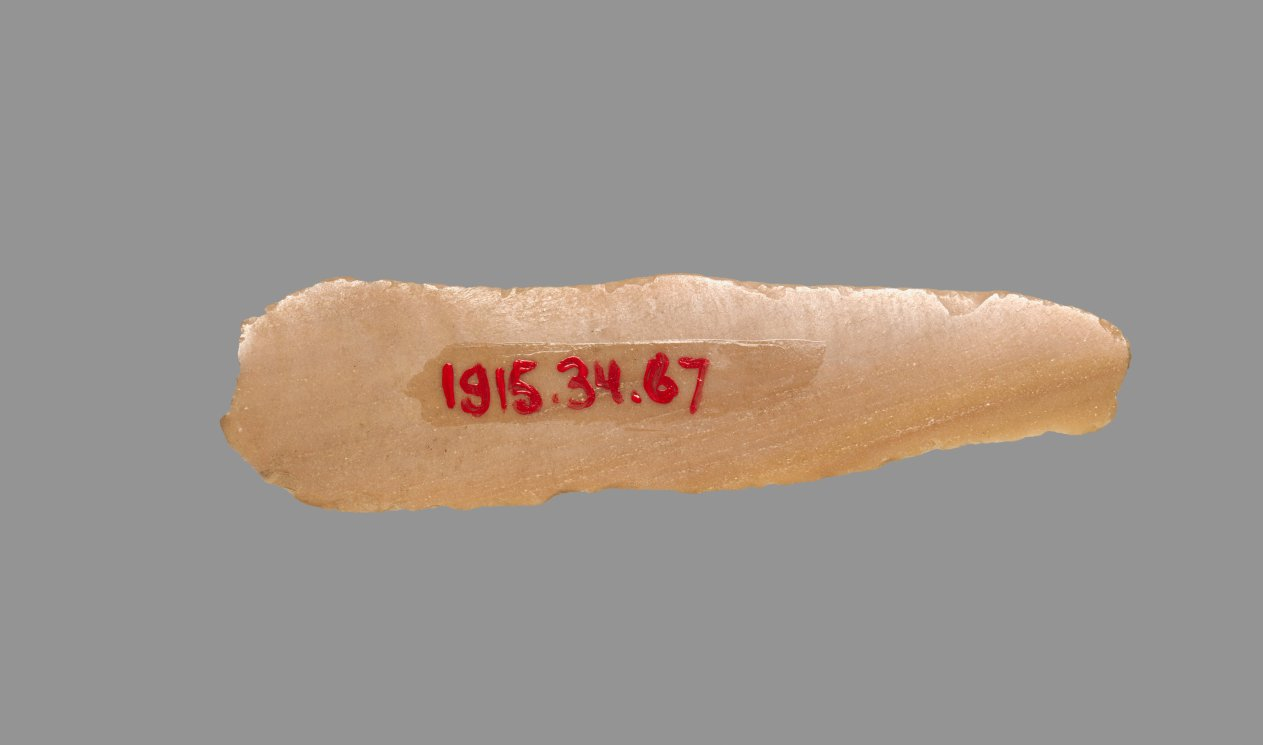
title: Sickle Blade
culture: Egypt, Middle Kingdom (2040–1648 BCE), Dynasty 12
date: 1980–1801 BCE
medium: flint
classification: Implements